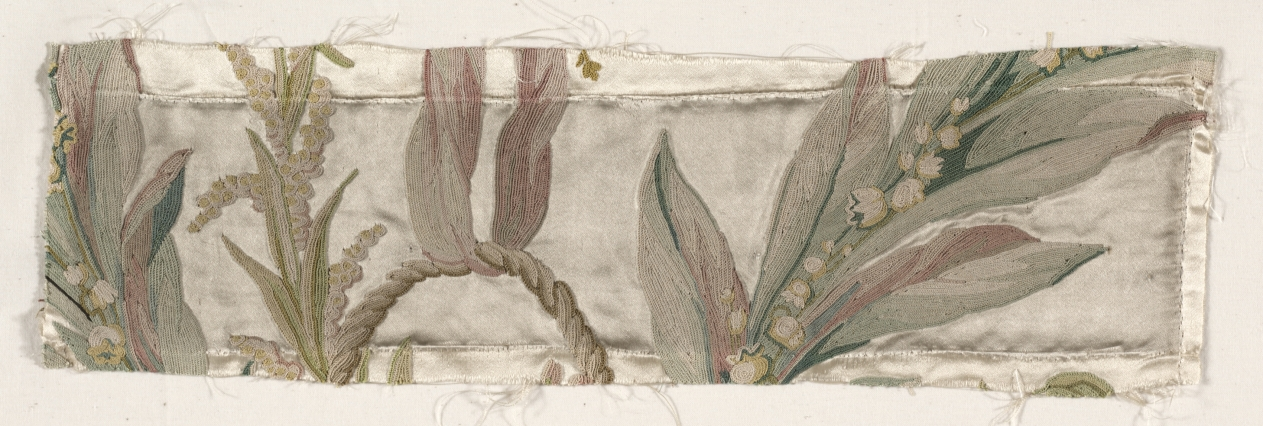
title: Coverlet Fragment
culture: France, 18th Century, period of Louis XVI (1774-1793)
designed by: Philippe de Lasalle (French, 1723–1805)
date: c. 1760–1770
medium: embroidered satin and silk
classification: Textile